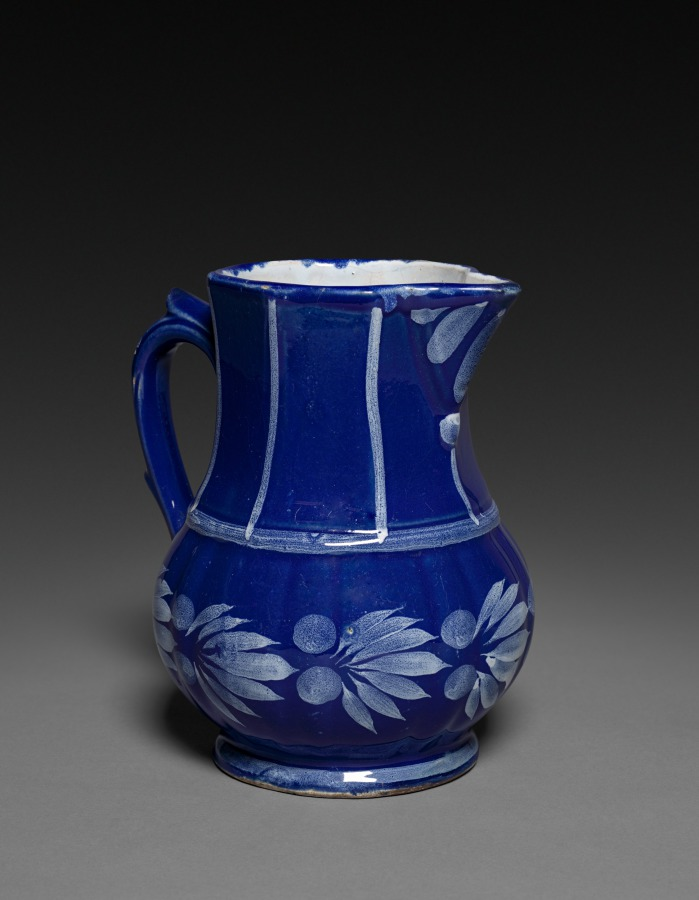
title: Jug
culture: France, 18th century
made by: possibly by Saint Omer Factory (French)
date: late 1700s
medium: faience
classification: Ceramic